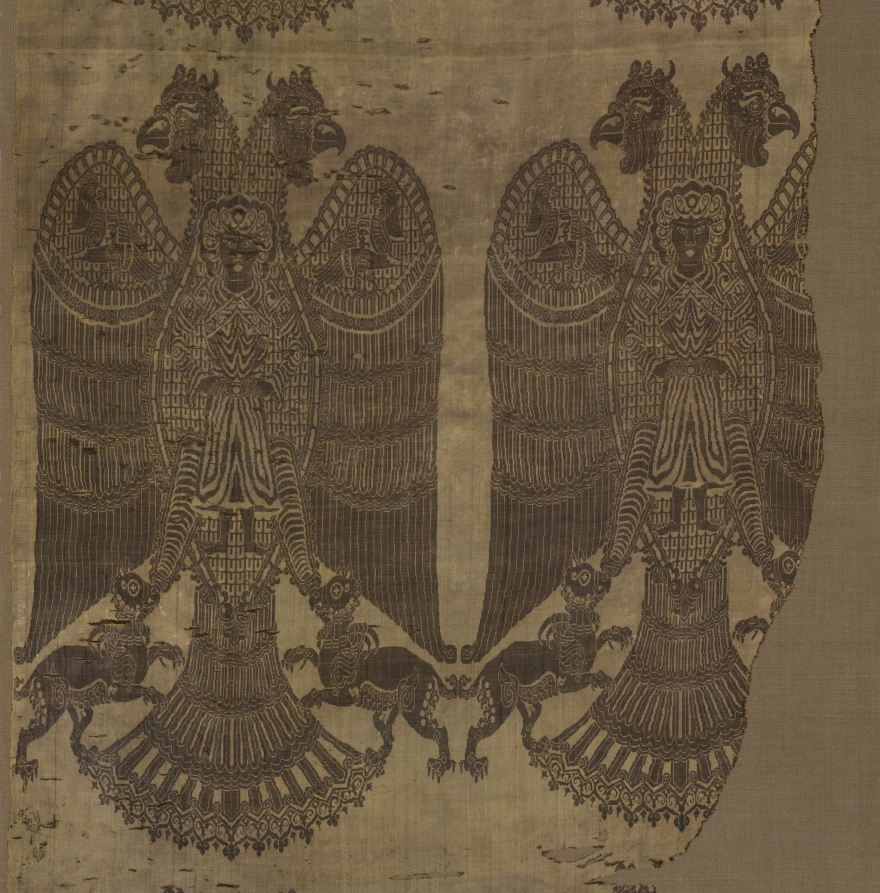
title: Fragment with Inscription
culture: Iran, in the style of the Buyid period (945–1055)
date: before 1962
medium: Silk: lampas weave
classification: Textile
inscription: On the wing of each small bird is an inscription: "al-rahmah" [mercy].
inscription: On the upper part of the arms of the small standing figure: "al-barakah" [blessing].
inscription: At top of textile: "baqayta amir al-mu'minin fa-innama baqa['u]ka hasan lil-zaman wa-tay-yib"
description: A design in dark brown on a background of dark tan preserves five nearly complete double-headed "eagles" and almost half of a sixth, arranged in aligned rows. Each eagle grasps griffins in its talons. Small birds decorate the shoulders of its wings, and on the wing of each small bird is inscribed with the word “mercy.” Superimposed on the eagle, as if being carried, is a small standing human figure which bears on the upper part of its arms the word “blessing.” At the top of the textile, a Kufic inscription repeats a line from the diwan, collected poetry, of al-Buhturi.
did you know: The top inscription is a line by poet Al-Walīd ibn Ubaidillah Al-Buḥturī (821-897).